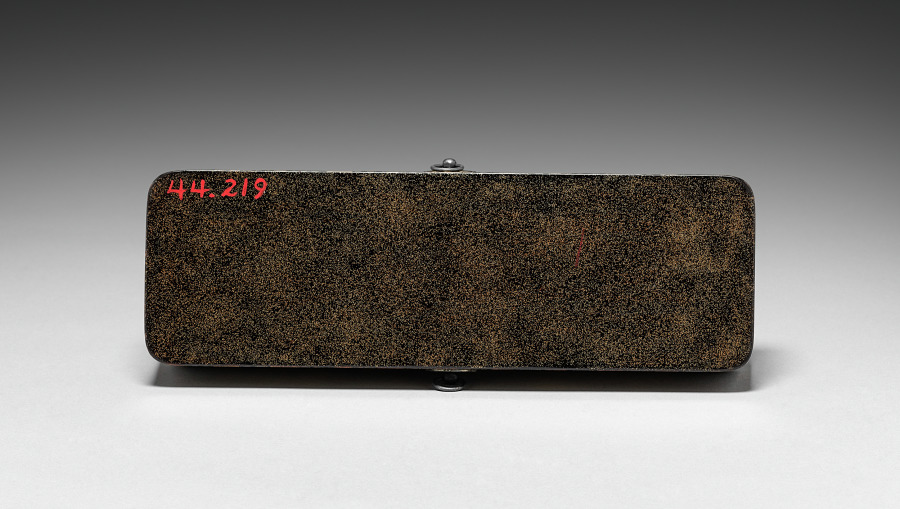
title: Letter Box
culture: Japan, Edo period (1615–1868)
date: 1615–1868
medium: lacquer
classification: Lacquer